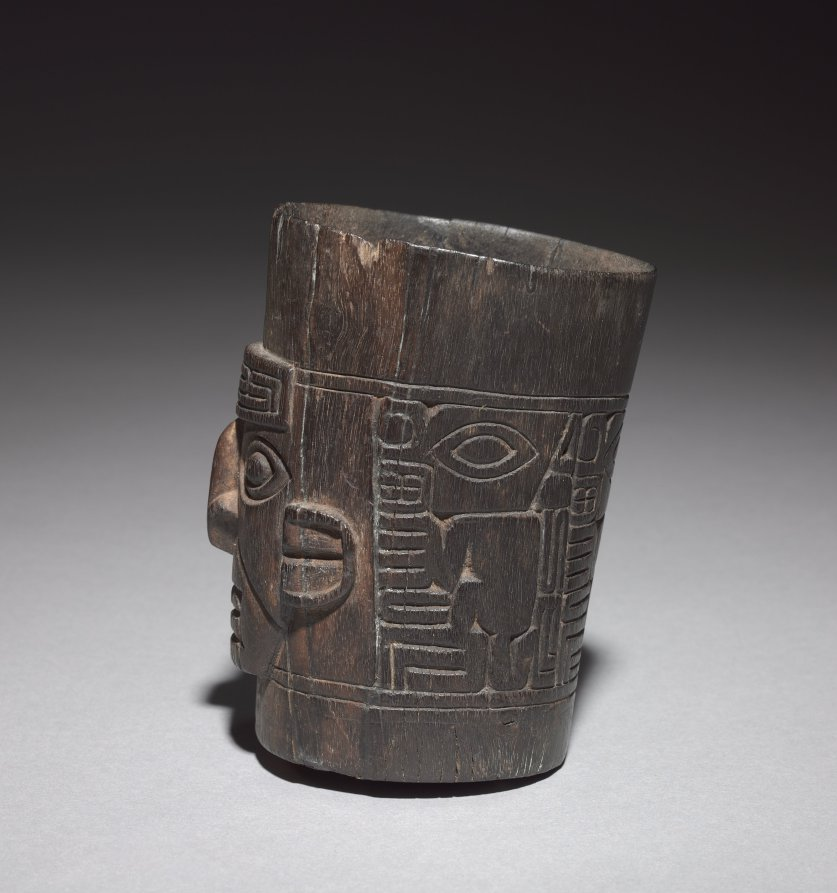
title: Cup with Head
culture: Peru, North-Central Coast(?), 9th-10th Century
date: 800–1000(?)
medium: wood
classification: Sculpture